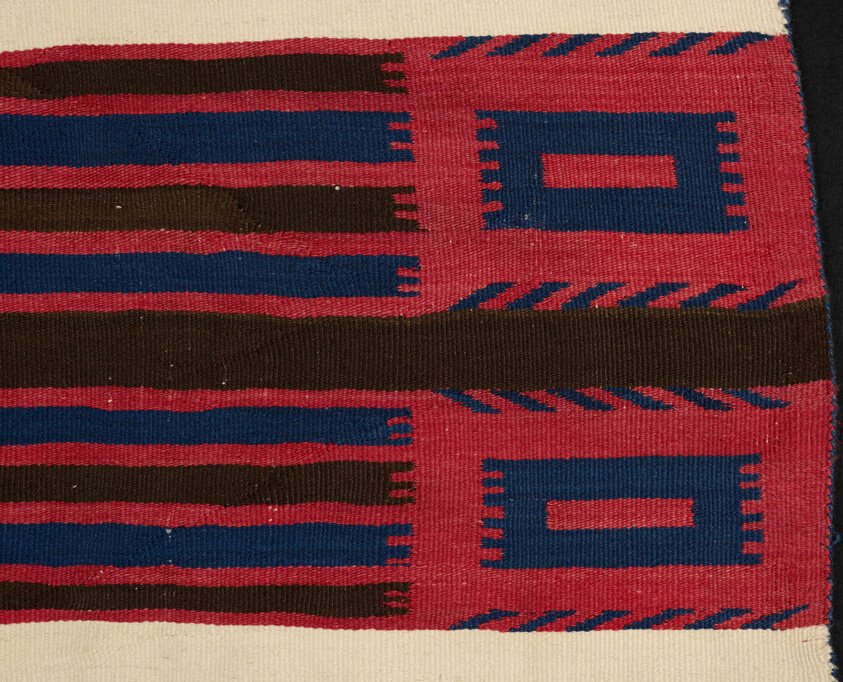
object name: Costume and Accessories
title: Wearing Blanket (Phase II)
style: navajo, americas, dine, 19th century, Arts of the Americas, indigenous, southwest, native american, north american, native north american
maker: Navajo (Diné) (Arizona, New Mexico, and Utah, United States)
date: 1850-65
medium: Wool; single interlocking tapestry weave; twined edges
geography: Navajo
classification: textile; blanket (covering); costume; garment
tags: geometric, arrow, squares, stripes